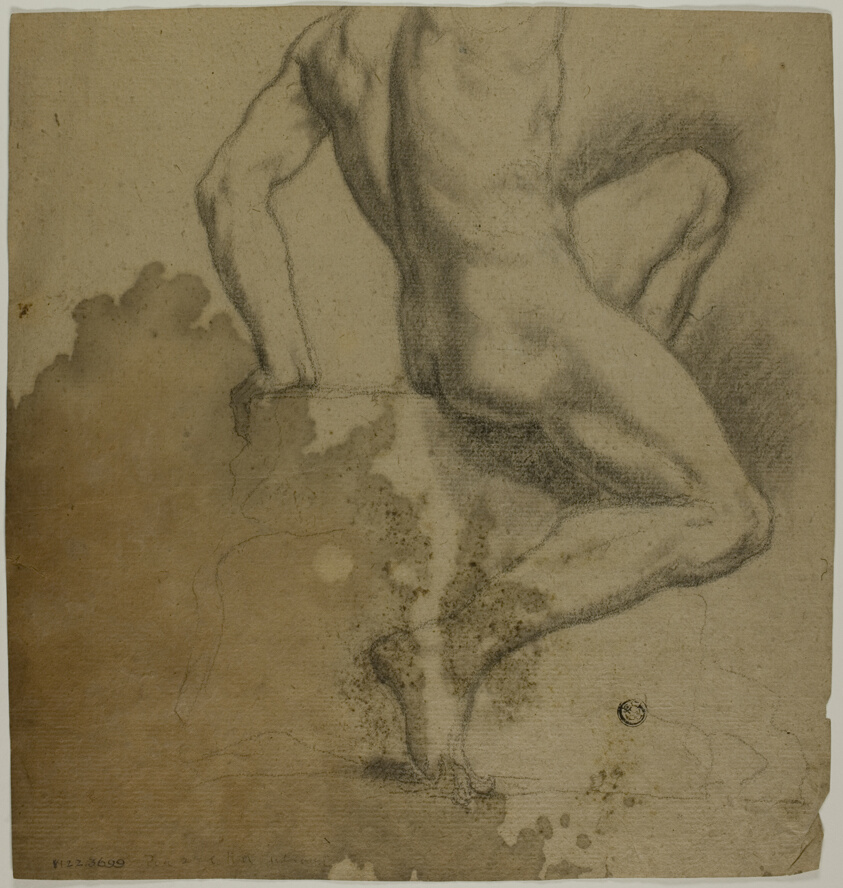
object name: Drawing and Watercolor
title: Lamb Bound to Shephard's Crook (recto); Seated Academic Male Nude, From Back, Turning Right (verso)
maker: School of Giovanni Battista Piazzetta (Italian, 1682-1754)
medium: Black and white chalk (recto), and black chalk (verso), on brown laid paper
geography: Italy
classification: drawings (visual works); prints and drawing